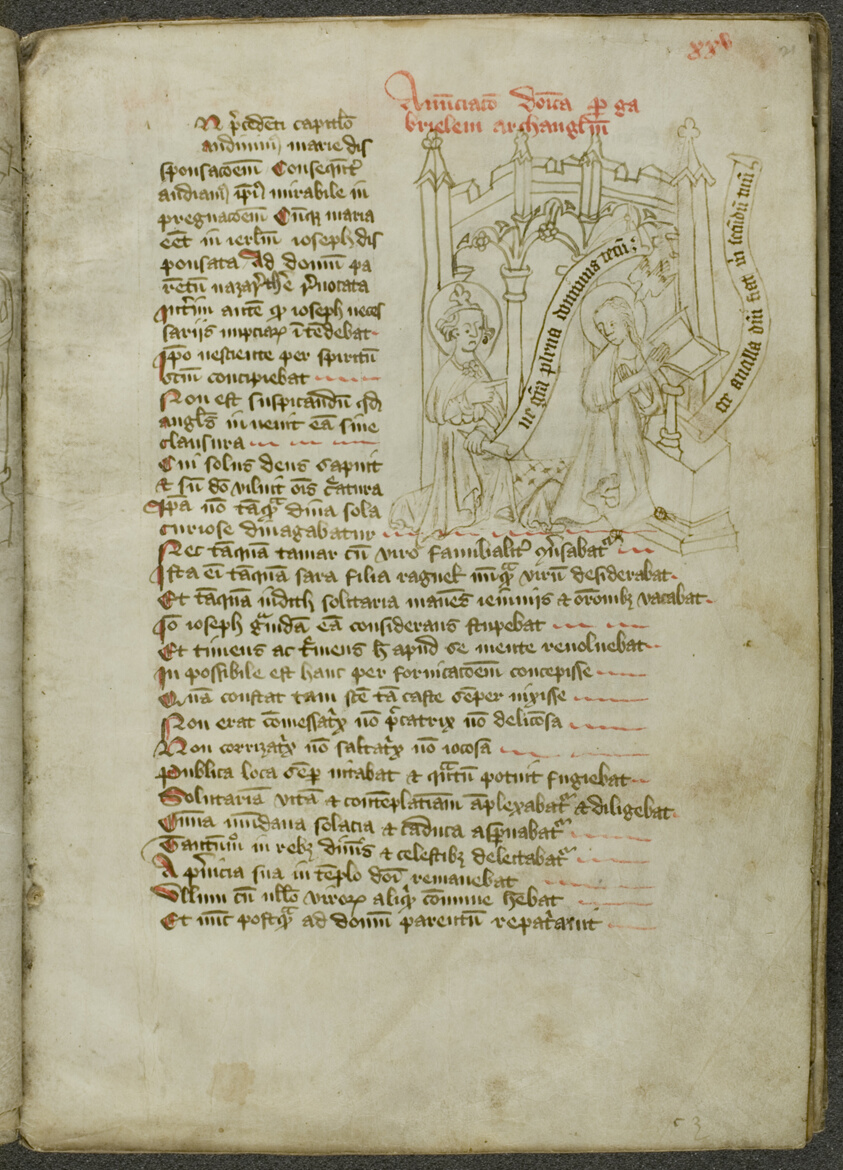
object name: Book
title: Speculum Humanae Salvationis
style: medieval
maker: English; from the Abbey of Great Missenden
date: 1382/1406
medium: Manuscript with 111 folios and many drawings in pen and brown and red inks, a few with tempera, and some traced in graphite, with other decorations and Latin inscriptions in Anglicana formata in brownish black and red ink, ruled in red, on vellum, bound in oak boards with worn sheepskin covers, missing chain and clasps from upper cover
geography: England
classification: pen and ink drawings; manuscript; book; prints and drawing